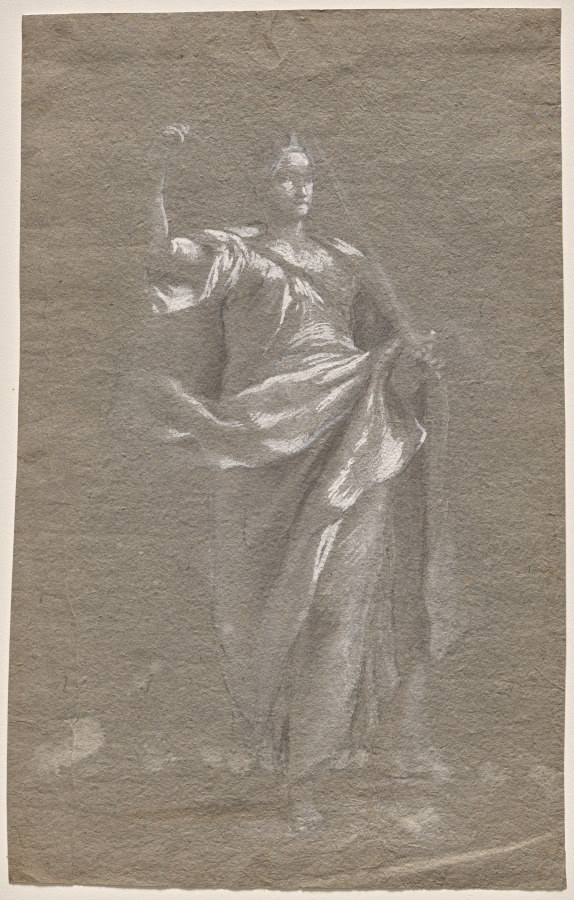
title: Allegorical Figure (recto)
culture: Italy, style of 17th century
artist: Anonymous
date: 1800s?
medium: black chalk and brush and brown and gray wash heightened with white and gray gouache, with traces of stylus and white chalk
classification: Drawing